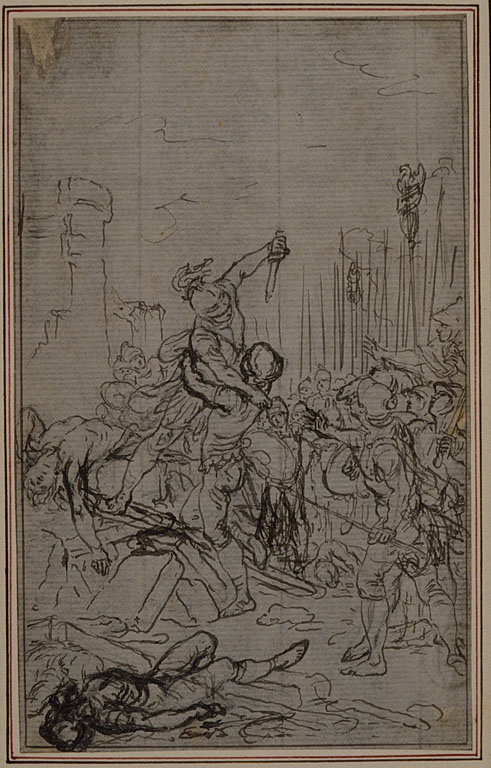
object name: Drawing and Watercolor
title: Study for Lucain's "La Pharsale", Canto VI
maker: Hubert François Gravelot (French, 1699-1773)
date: c. 1766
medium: Pen and black ink, over graphite, on gray laid paper, incised for transfer and perimeter mounted on ivory laid paper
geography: France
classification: pen and ink drawings; drawings (visual works); prints and drawing